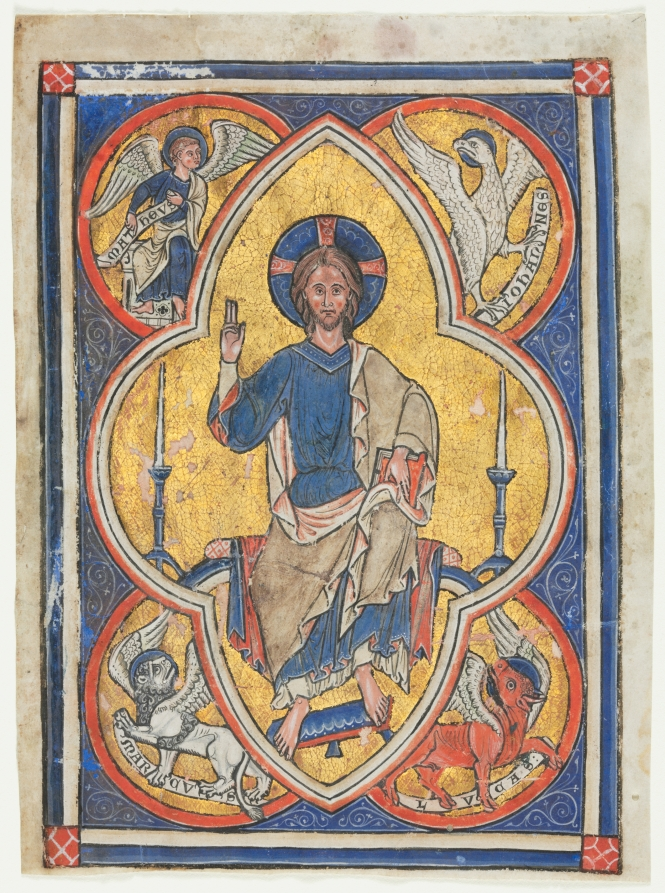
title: Miniature Excised from a Psalter: Christ in Majesty with Symbols of the Four Evangelists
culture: England, Abbey of Peterborough(?), 13th century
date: c. 1235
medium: ink, tempera, and gold on vellum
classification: Manuscript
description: Christ is seated within a cusped frame representing his aura. He is surrounded by the four "living creatures"---the gospel writers---as envisioned by Saint John in his Apocalypse: a winged man (St. Matthew), a lion (St. Mark), an ox (St. Luke), and an eagle (St. John).